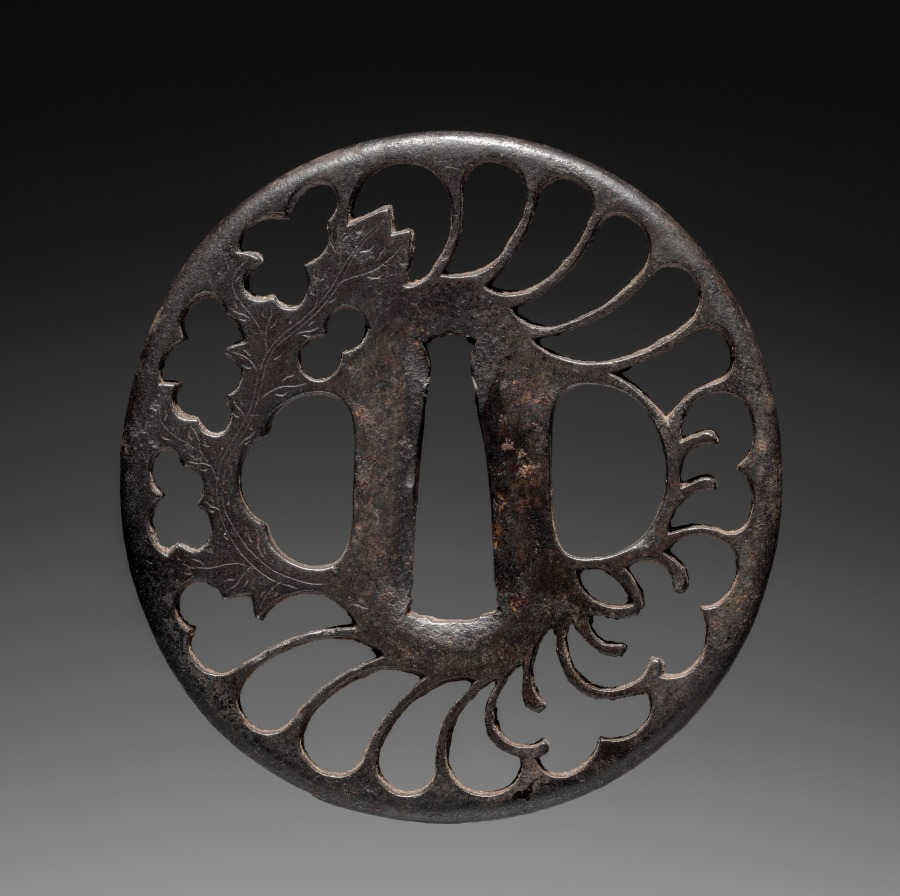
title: Sword Guard (Tsuba) with Chrysanthemum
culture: Japan, possibly Edo period (1615-1868)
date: c. 1615–1868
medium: iron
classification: Arms and Armor